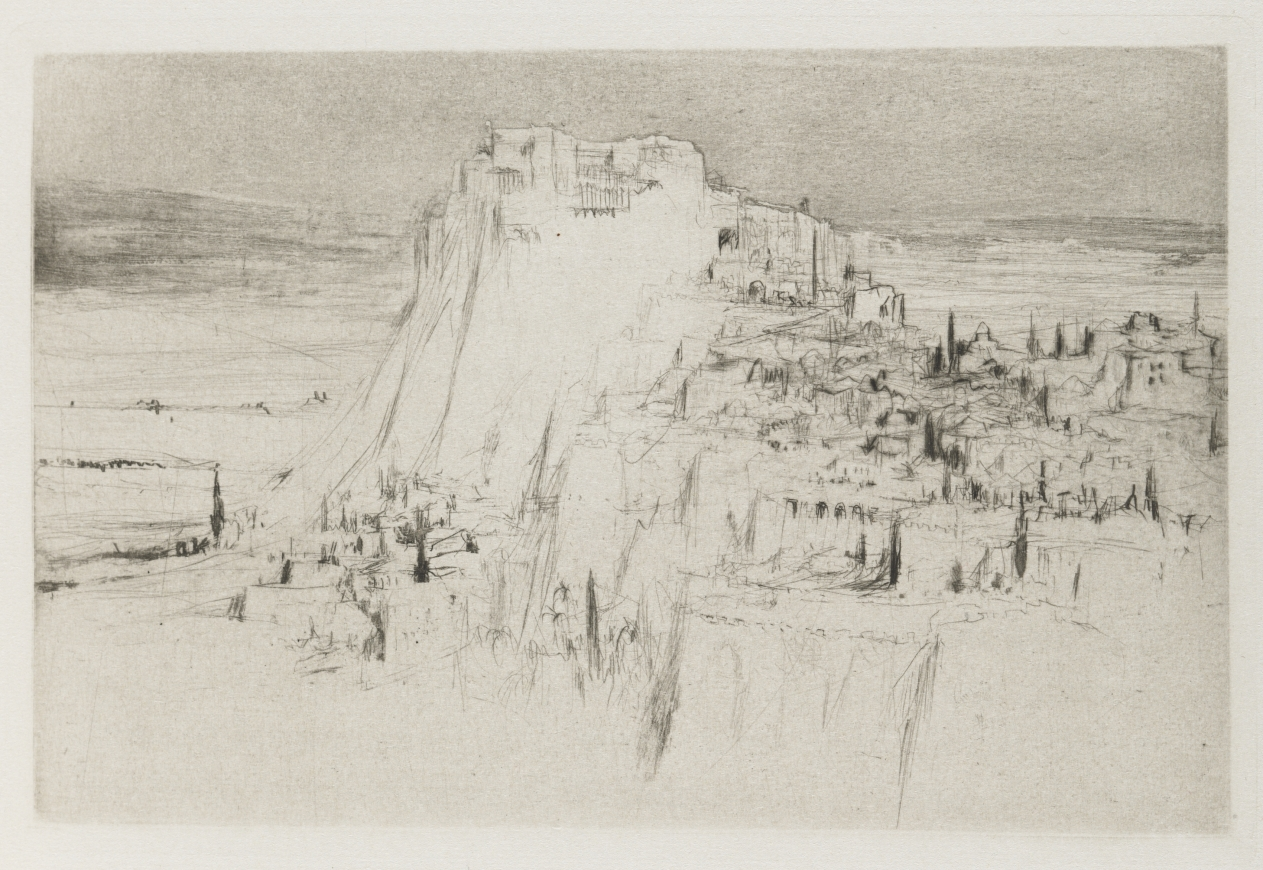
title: Herodias: Page 3, The citadel of Machaerus rose from the eastern side of the Dead Sea, on a peak of basalt, having the shape of a cone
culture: England, 20th century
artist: William Walcot (British, 1874–1943)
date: 1928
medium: etching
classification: Print